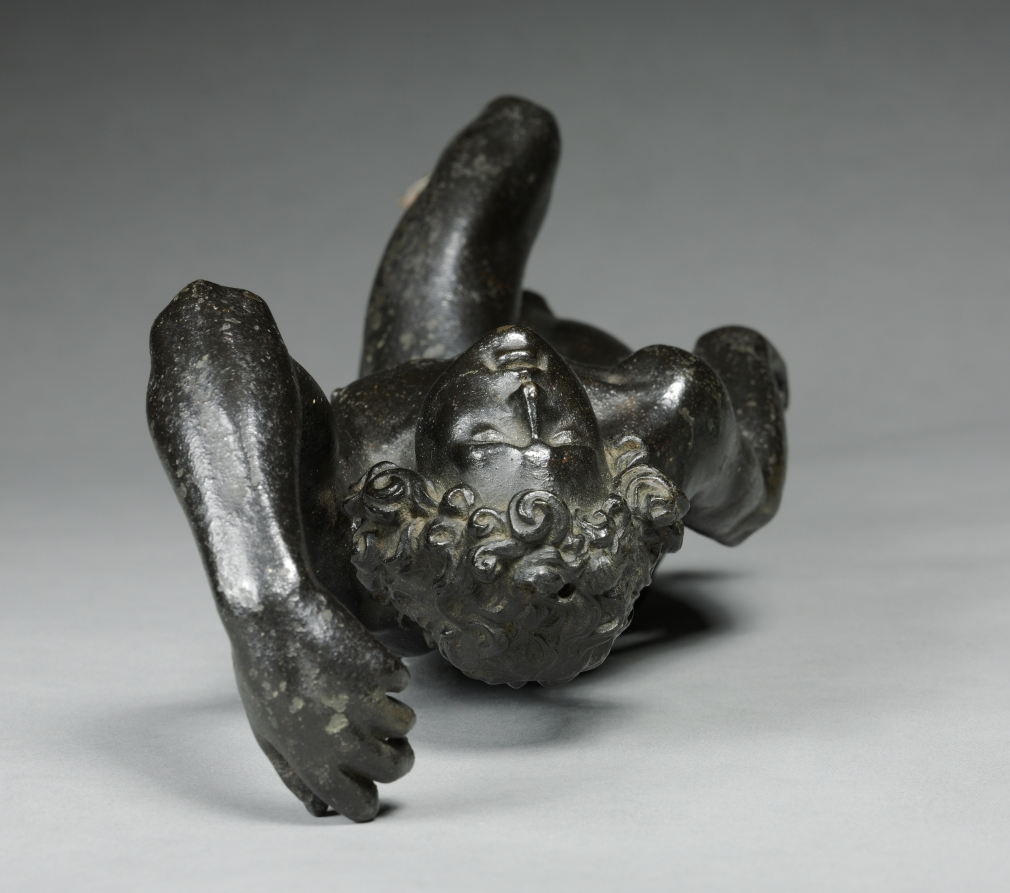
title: Saint Sebastian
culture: Germany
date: 1600s or later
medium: bronze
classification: Sculpture